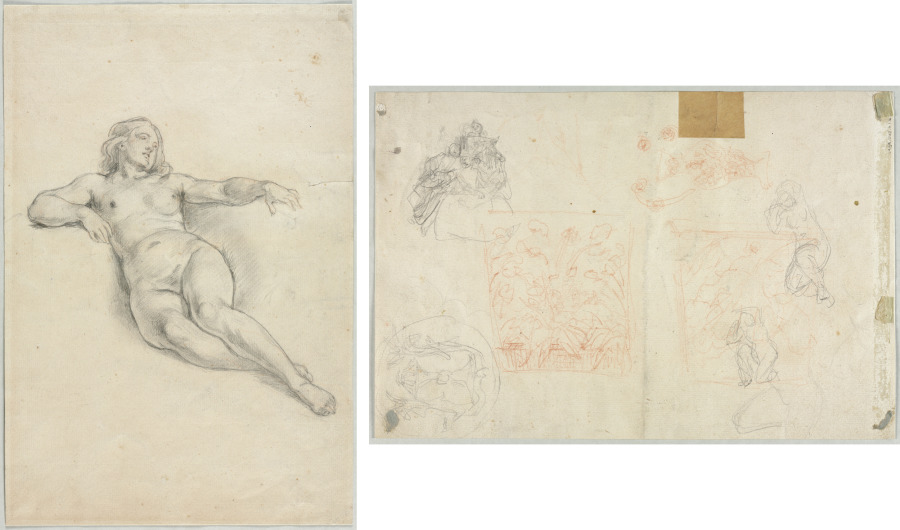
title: Reclining Female Nude (recto); Various Sketches of Figures and Plants (verso)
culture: France, 19th century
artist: Anonymous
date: 19th century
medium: graphite, with stylus and traces of red gouache(?)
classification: Drawing